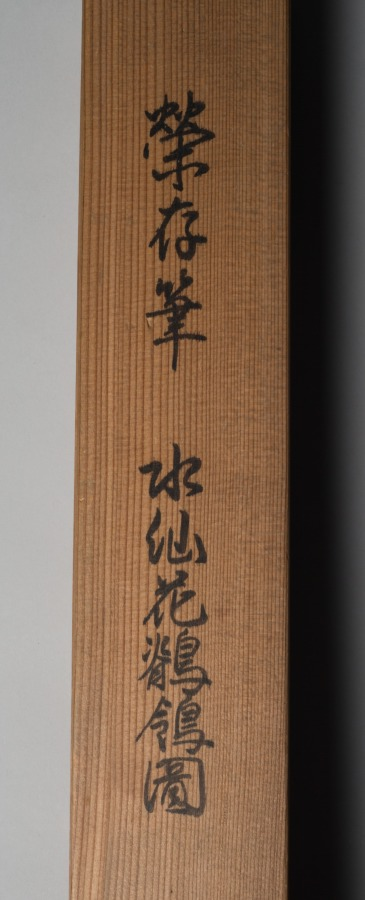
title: Wagtails and Narcissus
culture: Japan, Muromachi period (1392–1573)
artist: Eison (Japanese)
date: mid-1500s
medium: hanging scroll; ink on paper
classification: Painting